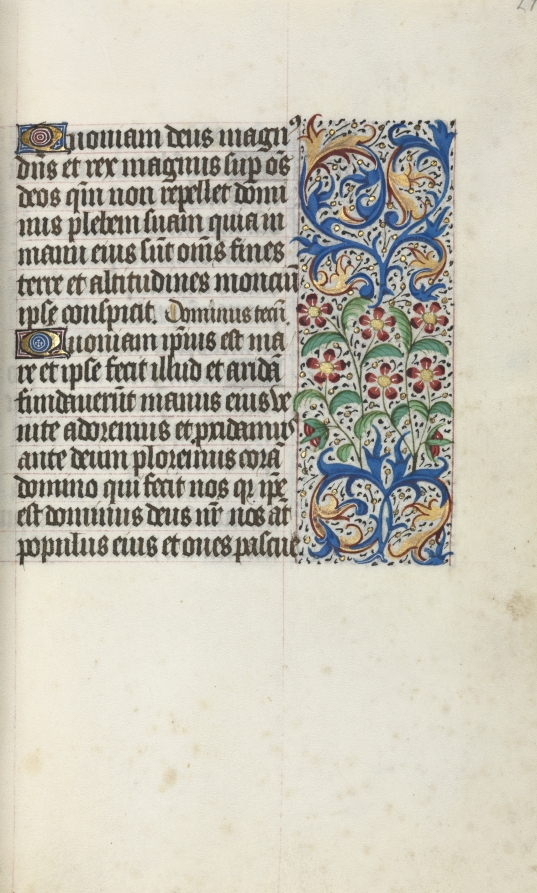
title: Book of Hours (Use of Rouen): fol. 29r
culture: France, Rouen, 15th century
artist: Master of the Geneva Latini (French, active Rouen, 1460–80)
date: c. 1470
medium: ink, tempera, and gold on vellum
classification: Bound Volume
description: In the late 1400s and early 1500s Rouen was an established and important center of book production. The city’s cathedral had a wealthy chapter that spent large sums of money to commission books and to maintain its extensive library. The stationers and booksellers would have likely been concentrated in or near the cathedral precinct. This artist, named after a manuscript now in Geneva, was Rouen’s principal illuminator during the second half of the 1400s.